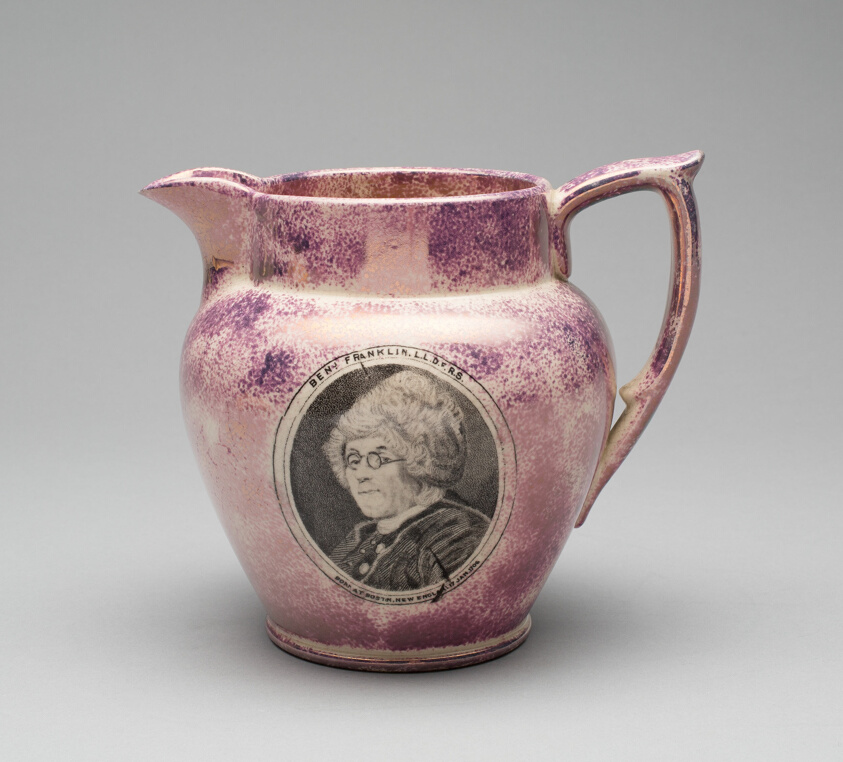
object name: Decorative Arts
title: Jug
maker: English for the American market; Staffordshire, England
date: c. 1825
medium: Earthenware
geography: Staffordshire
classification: vessel; earthenware; american decorative arts; ceramics; decorative arts